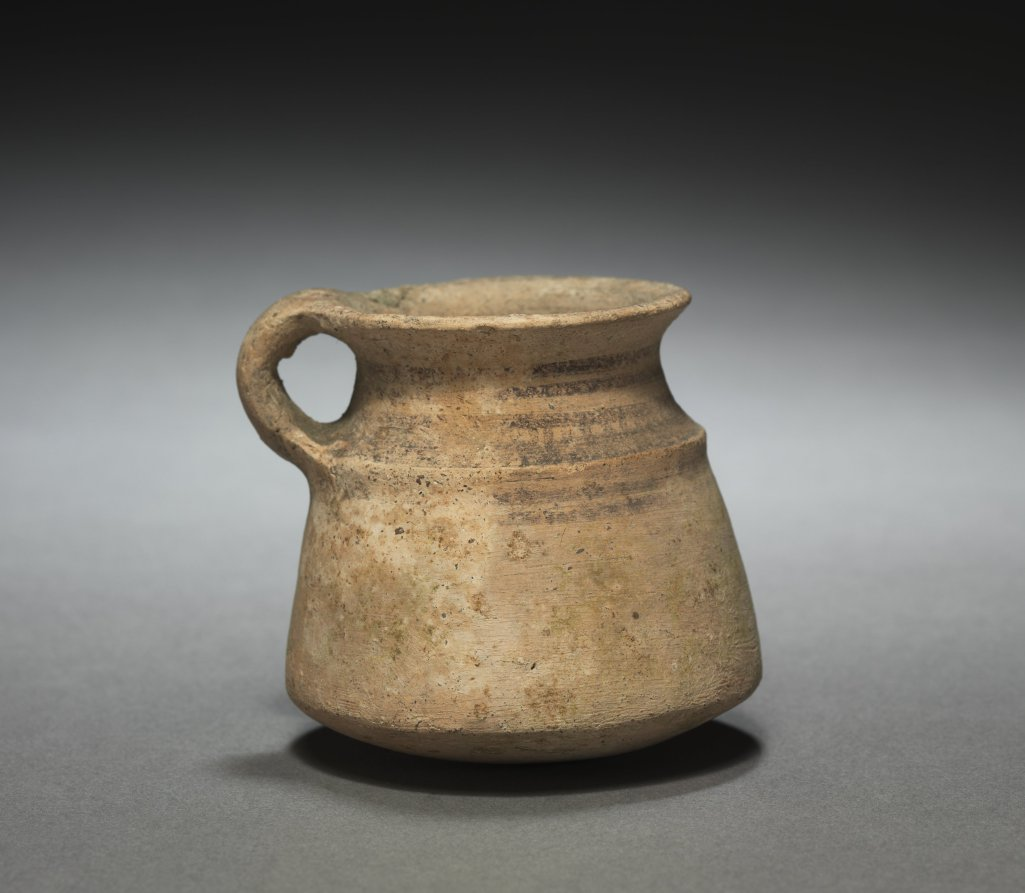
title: Pot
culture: Iran, Luristan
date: 3000–2000 BCE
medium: earthenware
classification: Ceramic